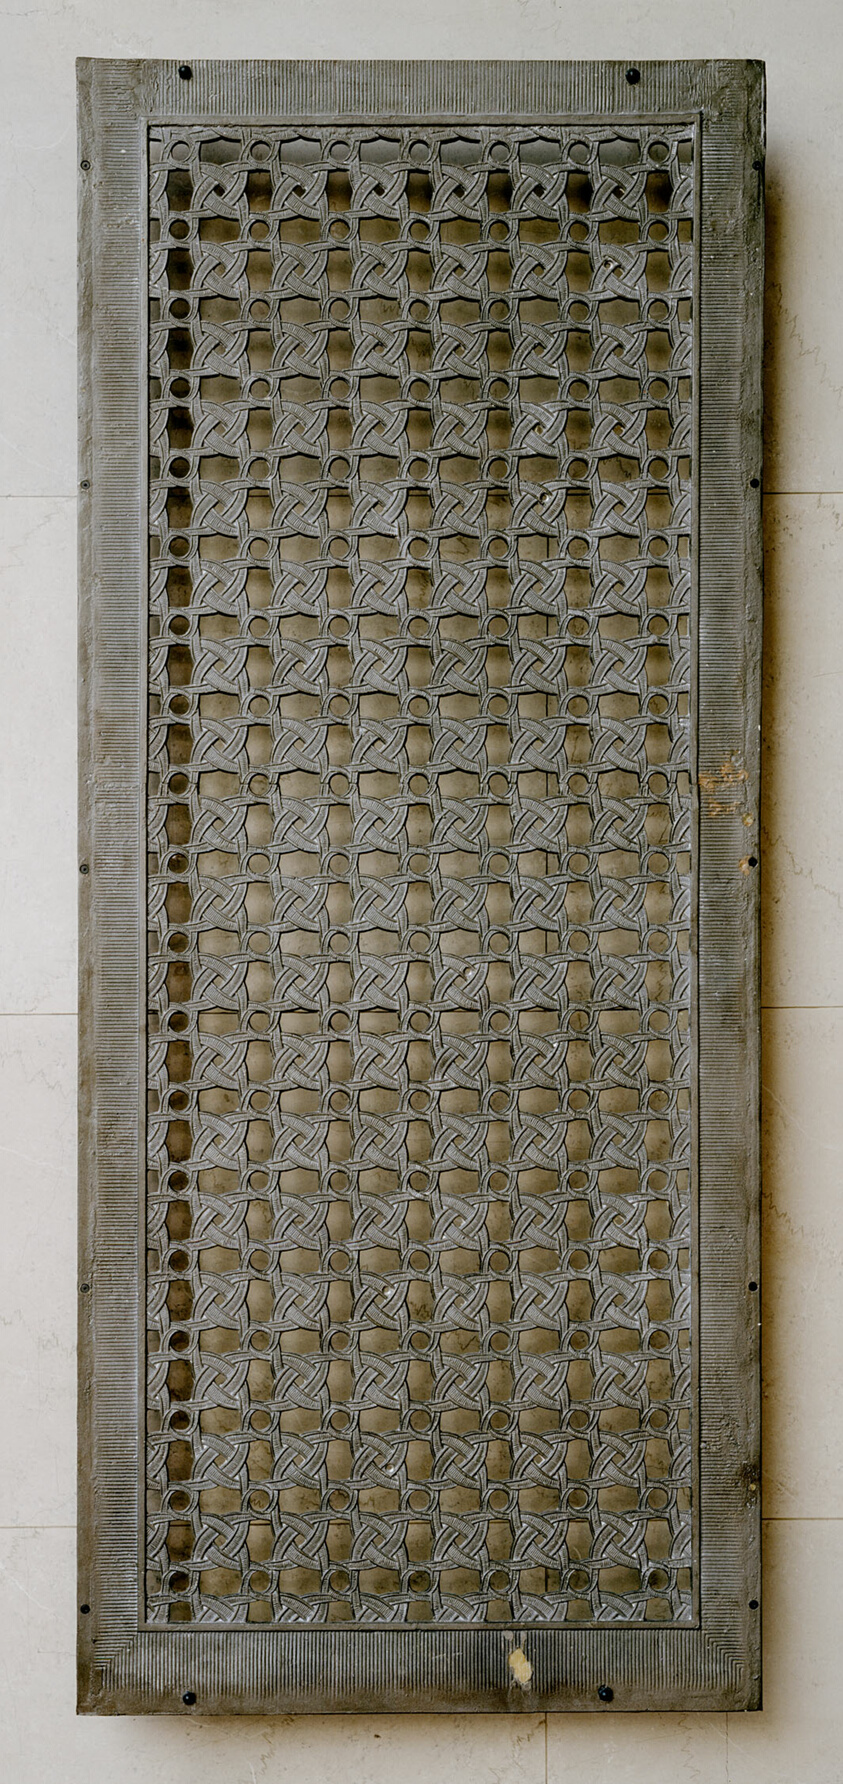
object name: Architectural fragment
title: Rookery Building, 209 South La Salle Street, Chicago, Illinois: Grille from Interior Central Court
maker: Burnham & Root (American, 1873-1891); Architect and designer: John Wellborn Root (American, 1850-1891)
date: c. 1885/88 Removed during 1905–1907 renovation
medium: Wrought iron, bolted to wall-mounted frame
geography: LaSalle Street, 209 South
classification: iron; metal; architectural fragment; architecture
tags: Chicago